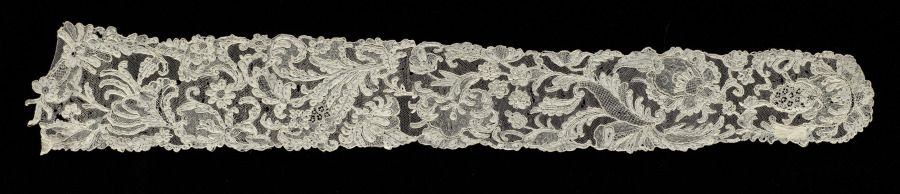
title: Lace Lappet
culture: France, Alençon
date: 1700s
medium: Linen: needle lace (Point d'Alençon)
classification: Lace